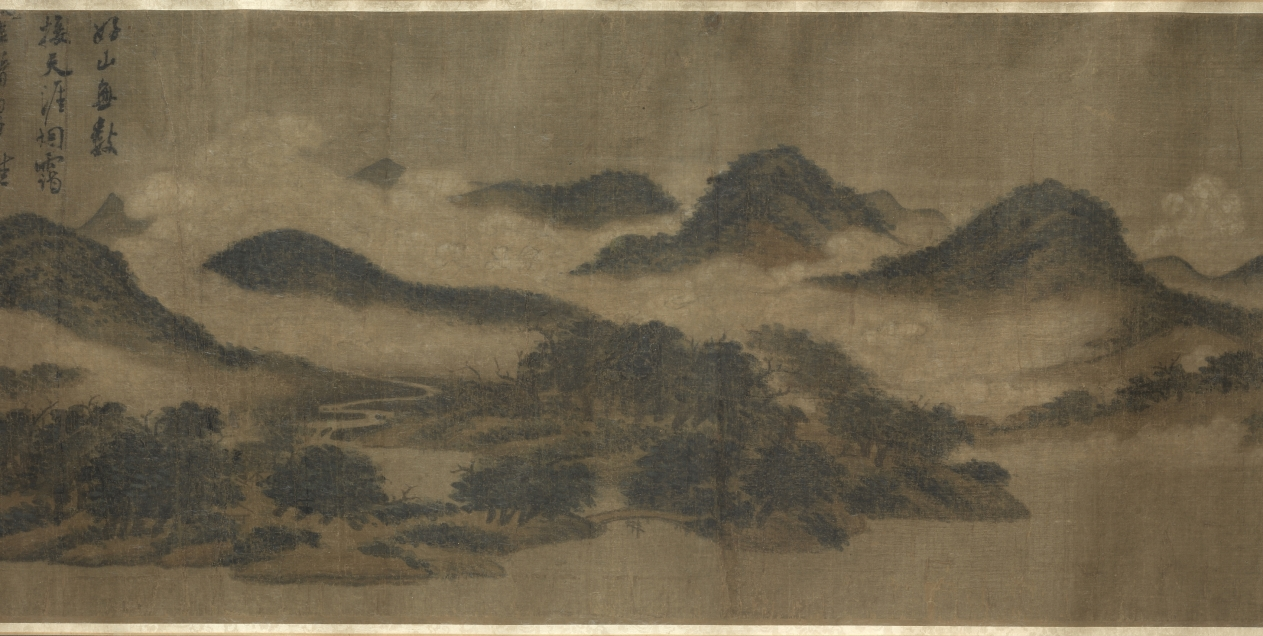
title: Cloudy Mountains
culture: China, Southern Song dynasty (1127-1279)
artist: Mi Youren (Chinese, 1072–1151)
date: 1130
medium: Handscroll; ink and color on silk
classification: Painting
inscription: 好山無數接天涯，烟靄陰晴日夕佳。/ 要識先生會到此，故留筆戲在君家。/ 庚戍歲，辟地新昌作。元暉。/ [seal] 元暉戲作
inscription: [Seal] 安陽孫氏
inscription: [Seal] 畢瀧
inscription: [Seal] 成親王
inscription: [Seal] 永瑆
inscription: [Seal] 錫三 appears twice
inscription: [Seal] 養性齋珍藏書畫印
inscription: [Seal] 芷陔審定真跡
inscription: [Seal] 玉簡齋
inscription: 2 colophons (1 dated 1650), inscription dated 1647, and 2 seals of Wang To (1592–1652)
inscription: 1 colophon, dated second month of the gengyin year 庚寅 (1650), and 2 seals of Chen Kuang 陳爌 (1646 jinshi degree)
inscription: 7 seals unidentified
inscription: A separate scroll containing six colophons on Cloudy Mountains exists; the inscribers are Luo Zhenyu 羅振玉 (1866–1940), Naito Torajiro 內藤虎次郎 (1866–1934), Nagao Ko 長尾甲 (1864–1942), and Wu Changshuo 吳昌碩 (1844–1927). Naito Torajiro alone wrote three colophons.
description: Cloudy Mountains captures the view of a lush and misty riverscape, an impression of Mi Youren’s new environment, painted in a moment of peace. With the fall of the Northern Song dynasty in 1127 upon the Jurchen’s military invasion, Mi Youren fled south across the Yangzi River. In 1130, he had reached Xinchang in Zhejiang province and thanked his host with this painting for having given him shelter. Mi Youren was the oldest son of the art critic Mi Fu (1051– 1107); both developed a distinct style of mountain scenery by accumulating wet ink dots that create a hazy atmosphere.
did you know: This scroll is one of the museum’s earliest dated Chinese paintings.